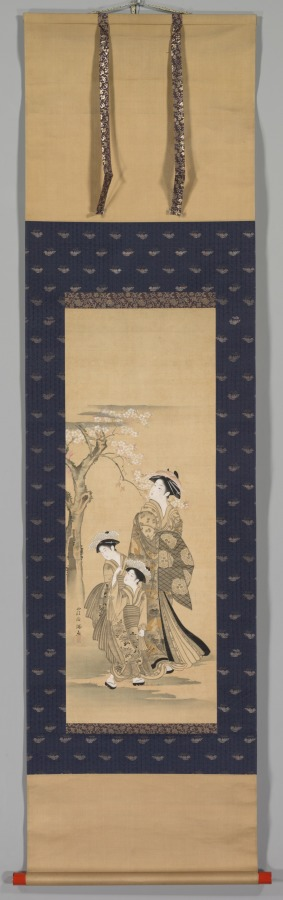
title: Woman and Two Children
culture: Japan, Meiji period (1868–1912)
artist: copy after Kubo Shunman (Japanese, 1757–1820)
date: early 1900s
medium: hanging scroll; color and gold on silk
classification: Painting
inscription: signed Kubo Shunman